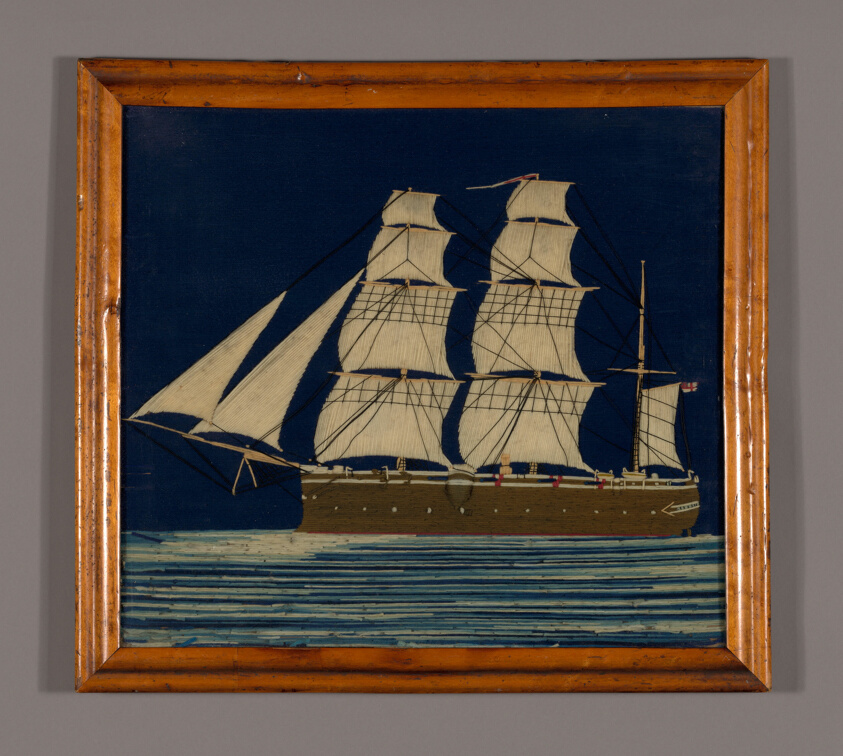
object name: Textile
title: Picture (Needlework)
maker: England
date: 1825/75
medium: Linen, plain weave; embroidered with wool and linen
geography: England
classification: textile; needlework (visual works)